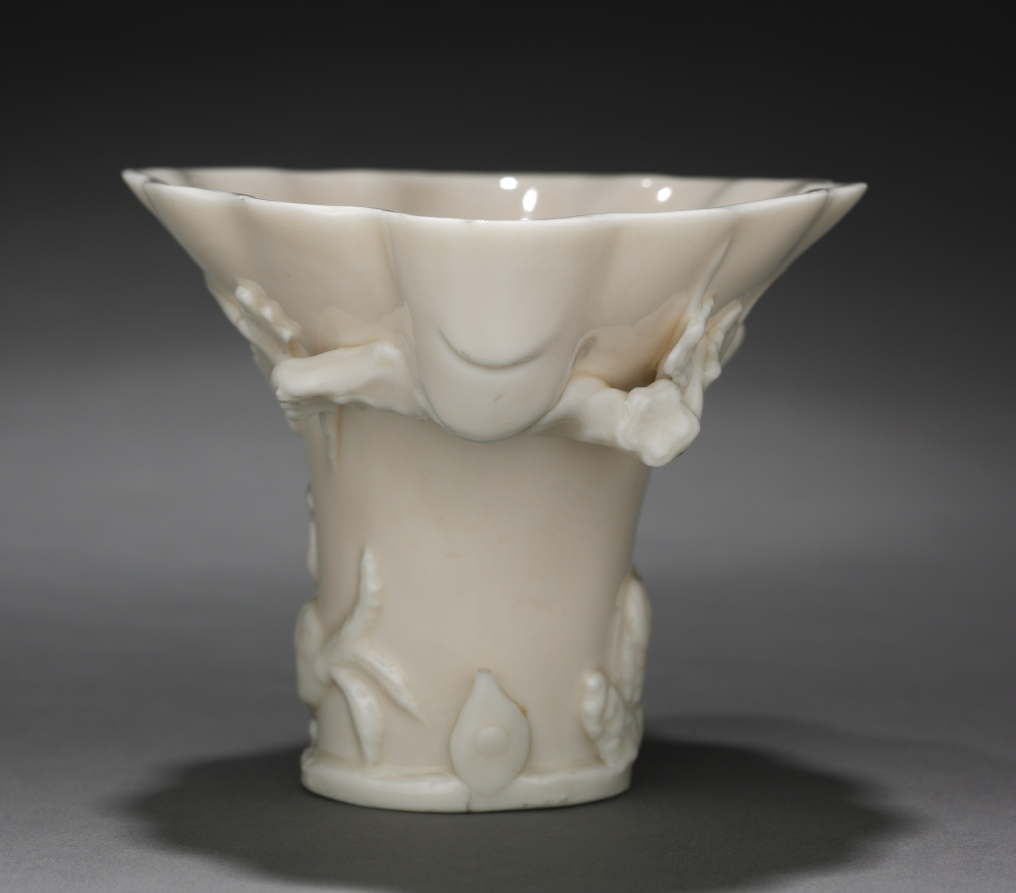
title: Libation Cup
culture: China, Qing dynasty (1644-1911), Kangxi reign (1661-1722)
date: 1662–1722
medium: porcelain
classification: Ceramic